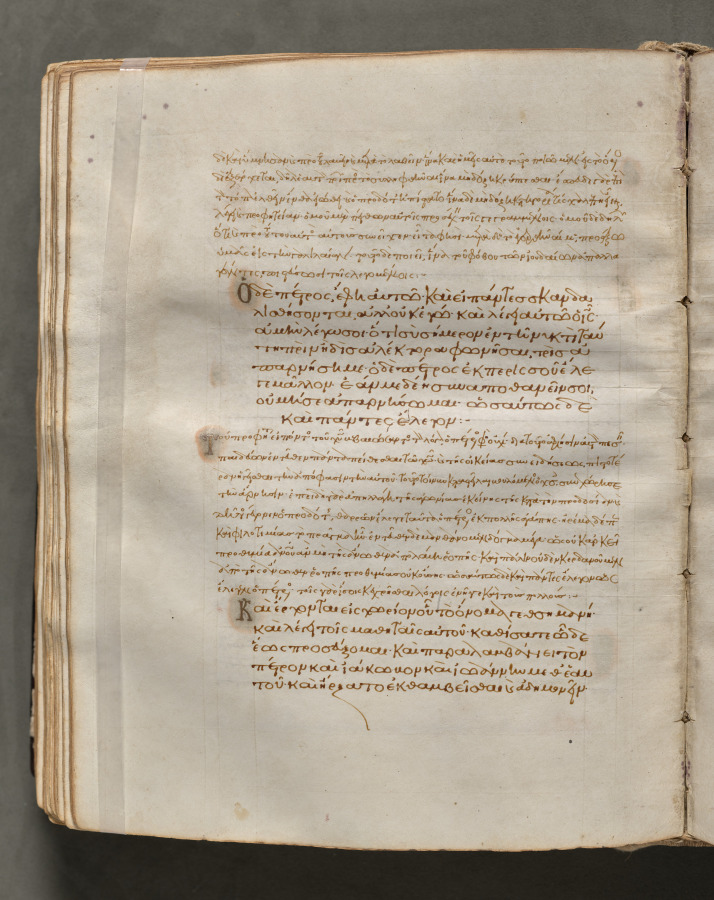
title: Text, folio 189 (verso), from a Gospel Book with Commentaries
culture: Byzantium, Constantinople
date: c. 1000–1100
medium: ink, tempera, and gold on vellum; leather binding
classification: Bound Volume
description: Each of the four gospels in this book opens on a page with brilliantly illuminated borders depicting the author of the text as well as birds-principally peacocks, symbols of the immortality of the soul-and fountains, representing the fountain of life and the salvation of the soul. This volume consists of 428 leaves with texts in Greek. Its level of sophistication suggests that it was probably written and decorated in a monastery in Constantinople.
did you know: Gospel Books were carried in procession through Byzantine churches.